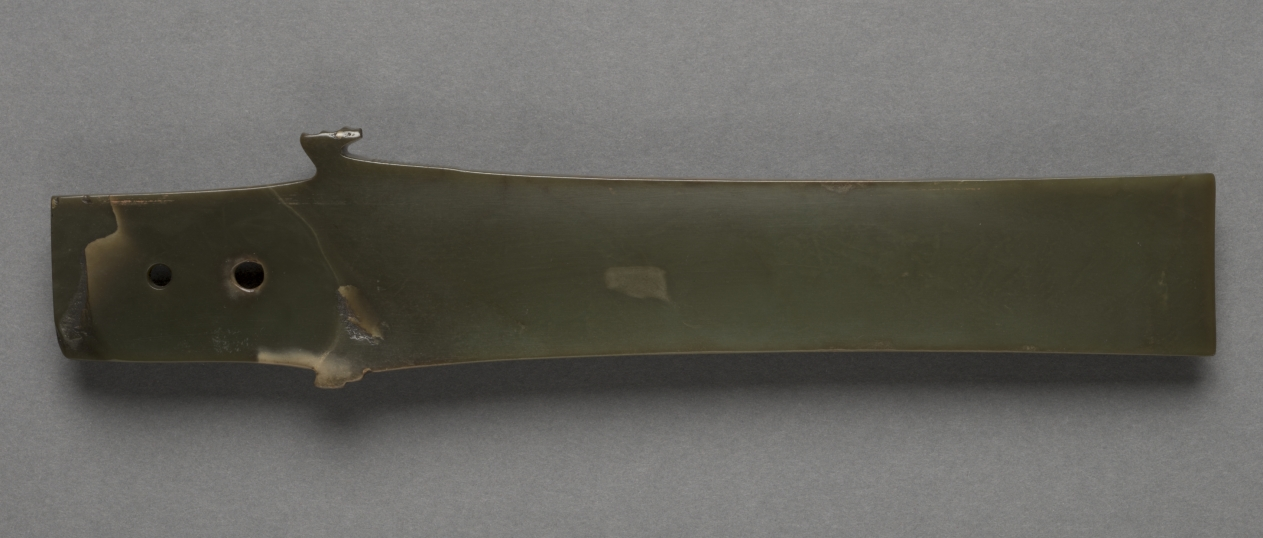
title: Ge (Dagger Axe)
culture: China, Neolithic period (3000s–2000s BCE) to Shang dynasty (c. 1766–1045 BCE)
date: c. 2500–1500 BCE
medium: nephrite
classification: Jade